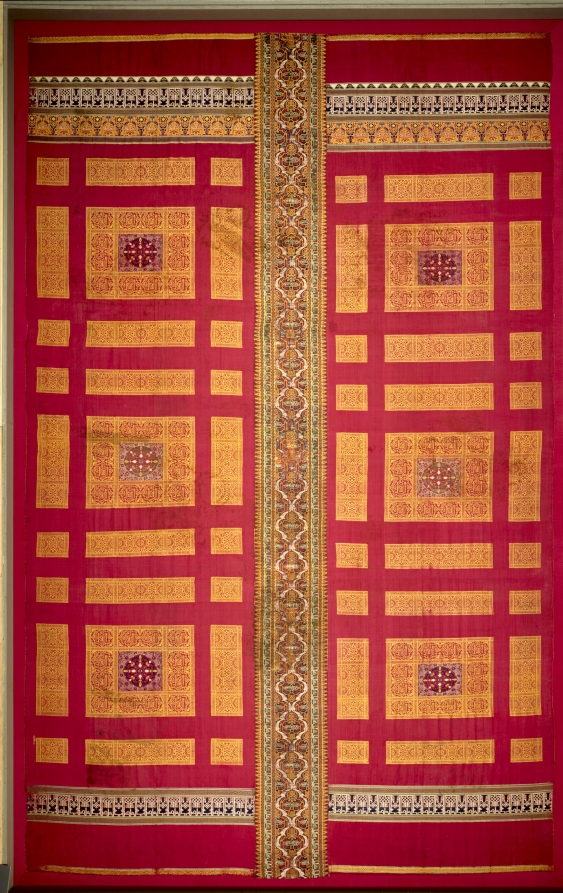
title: Alhambra Palace Silk Curtain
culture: Spain, Granada, Nasrid period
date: mid-1300s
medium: silk; lampas weave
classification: Textile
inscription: the bold knotted Kufic inscription in the top and bottom borders of the side panels repeats the Arabic word "felicity." Within the arches forming a frieze in the top border is a Kufic inscription "good fortune" and a Naskhi inscription repeating trhe motto of the Nasrid dynasty, "There is no conqueror but God." In the borders of the three large ornamental rectangles on each side panel is the Naskhi inscription "Dominion belongs to God alone." On the central panel the inscriptions in the borders repeat the phrase, "Majestry is God's," while the Nasrid motto, "There is no conqueror but God" and, above, "Blessing," are inscribed in the arabesque ogives.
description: This is one of two of the largest, most complete, and most ornate curtains to survive from the 1300s when it presumably hung in the royal Alhambra Palace in Granada, the last Muslim stronghold in Spain. Its style, artistic vocabulary, and harmonious proportions reflect the magnificent wall decoration in the Alhambra. The motto of the ruling Nasrid dynasty, "There is no conqueror but God," is inscribed in the end borders and central panel. The inscribed striped silk forming the central panel is more worn, suggesting that it was recycled, most likely during the 1300s.